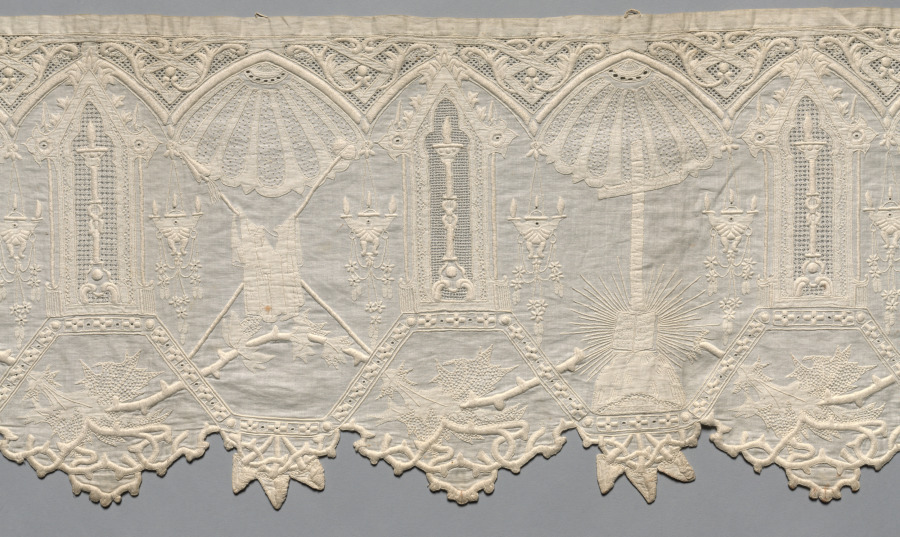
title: Altar Cloth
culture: Italy(?)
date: 1800s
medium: Plain weave cotton: needle lace (drawnwork), appliqué, and embroidery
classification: Embroidery